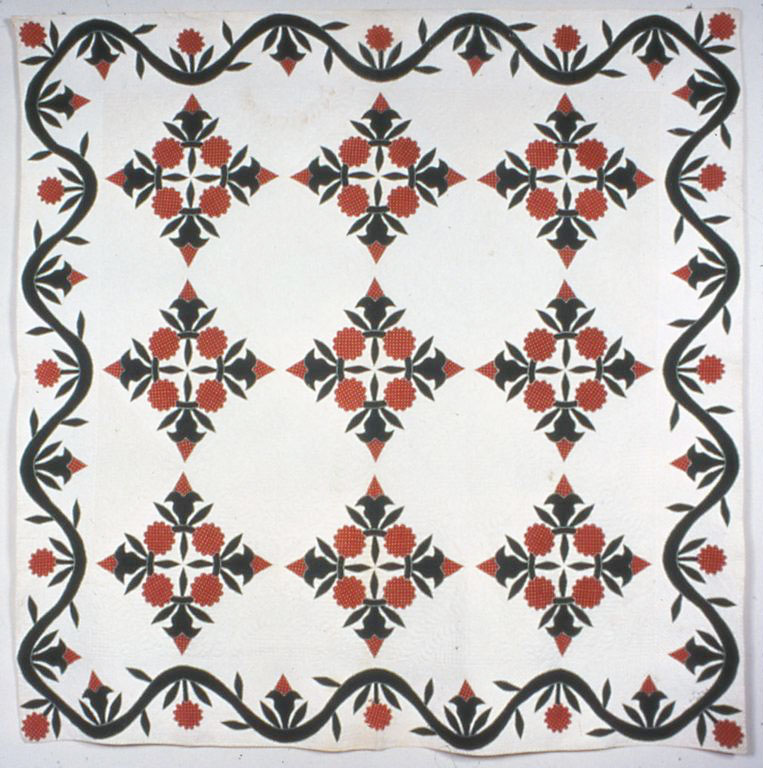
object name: Textile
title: Bedcover (A Wreath of Roses Quilt)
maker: Sarah (née Henry) Slane (American, 1825–1923); United States, Illinois, probably Princeville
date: 1850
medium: Cotton, plain weave, pieced; appliqued with cotton, plain weave, printed, attached in buttonhole stitch; quilted; backed with cotton, plain weave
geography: Illinois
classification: textile; needlework (visual works); needlework - quilt